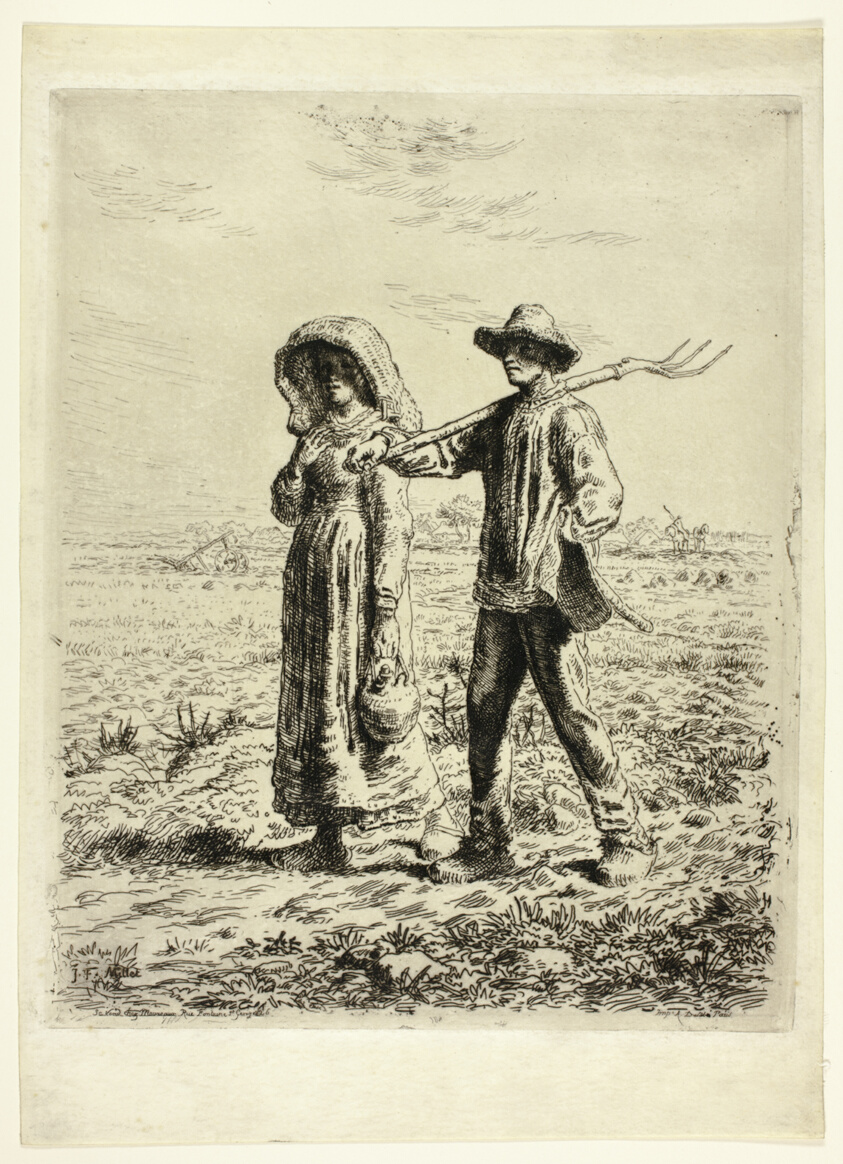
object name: Print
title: Peasants Going to Work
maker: Jean François Millet (French, 1814-1875); printed by Auguste Delâtre (French, 1822-1907)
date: 1863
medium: Etching and drypoint on ivory wove parchment paper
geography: France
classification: etching; print; prints and drawing